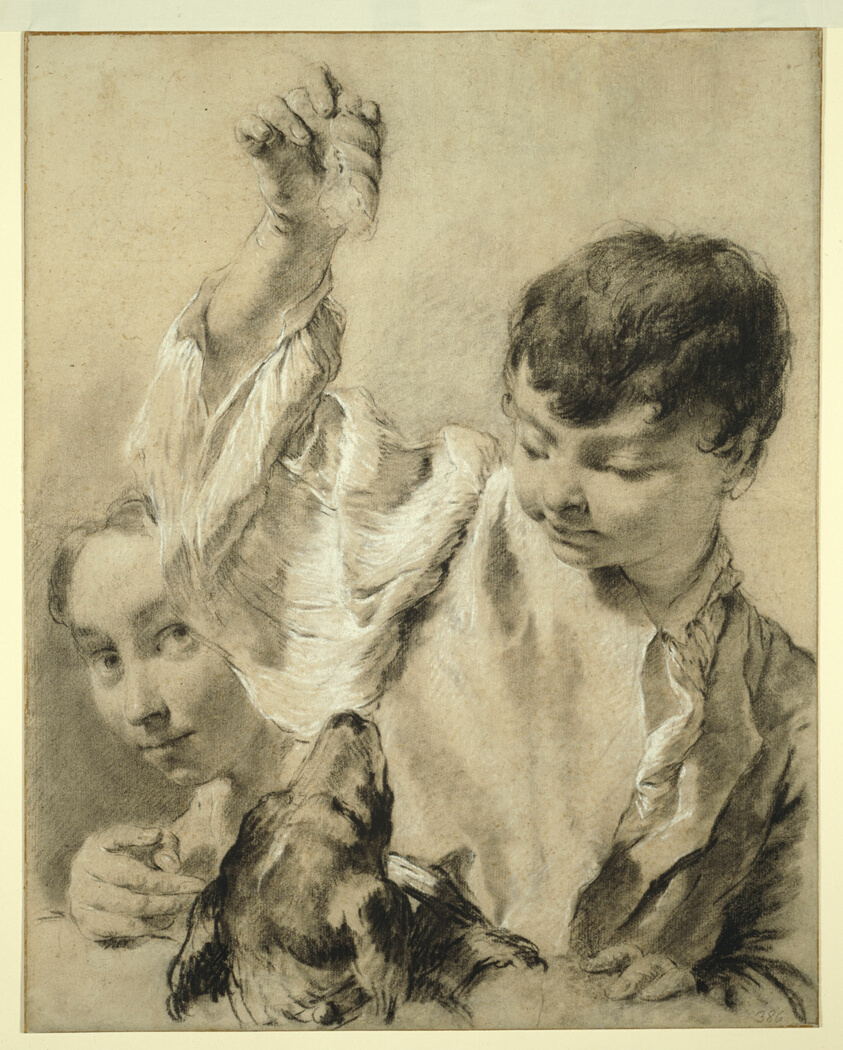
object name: Drawing and Watercolor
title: Giacomo Feeding a Dog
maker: Giovanni Battista Piazzetta (Italian, 1682-1754)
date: 1738/39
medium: Black chalk with stumping, with traces of charcoal, heightened with touches of white chalk, on blue-gray laid paper, discolored to cream, laid down on cream wood-pulp board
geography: Italy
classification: chalk; drawings (visual works); prints and drawing